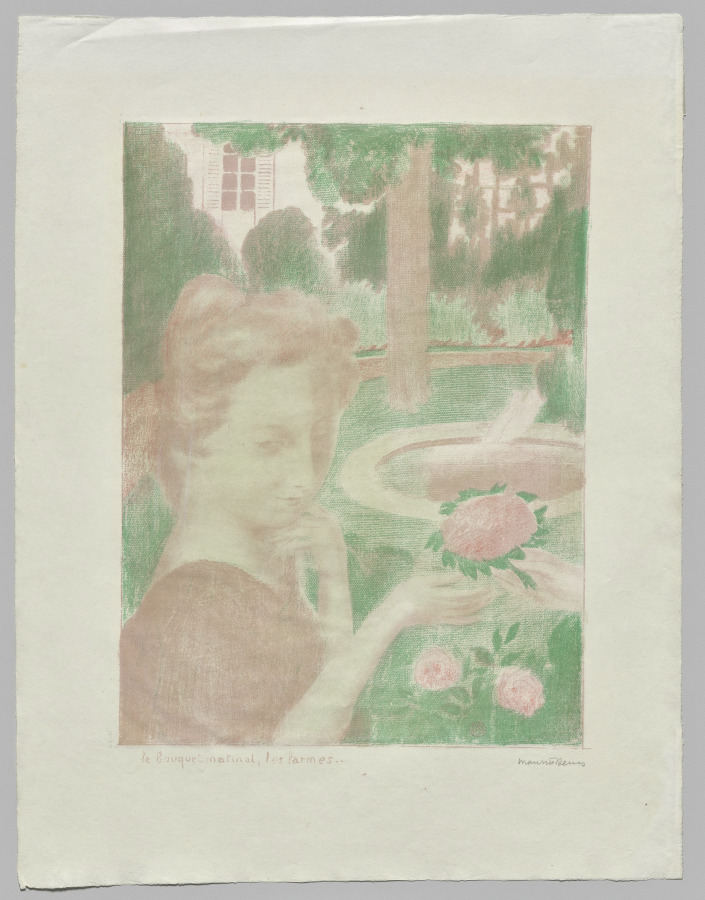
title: Morning Bouquet, Tears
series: Love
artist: Maurice Denis (French, 1870–1943)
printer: August Clot (French, 1858–1936)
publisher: Ambroise Vollard (French, 1867–1939)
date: 1899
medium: color lithograph on wove paper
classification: Print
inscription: Recto, lower left: le bouquet matinal, les larmes…”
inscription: In graphite, recto, lower right: “Maurice Denis (signed)”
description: Maurice Denis belonged to the Nabis, a group of artists who came together in 1889 to pursue a radical new style informed by subjective experience and emotion. This print is from a series in which Denis explored his devotion to his wife, Marthe, by depicting her in a variety of settings alongside titles drawn from his own journal. The vague but evocative images were meant to encourage the viewer to draw connections to the theme and meditate on its meaning.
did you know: Maurice Denis was a devout Catholic and often drew visual connections between his wife, Marthe, the subject of this print series, and the Virgin Mary.